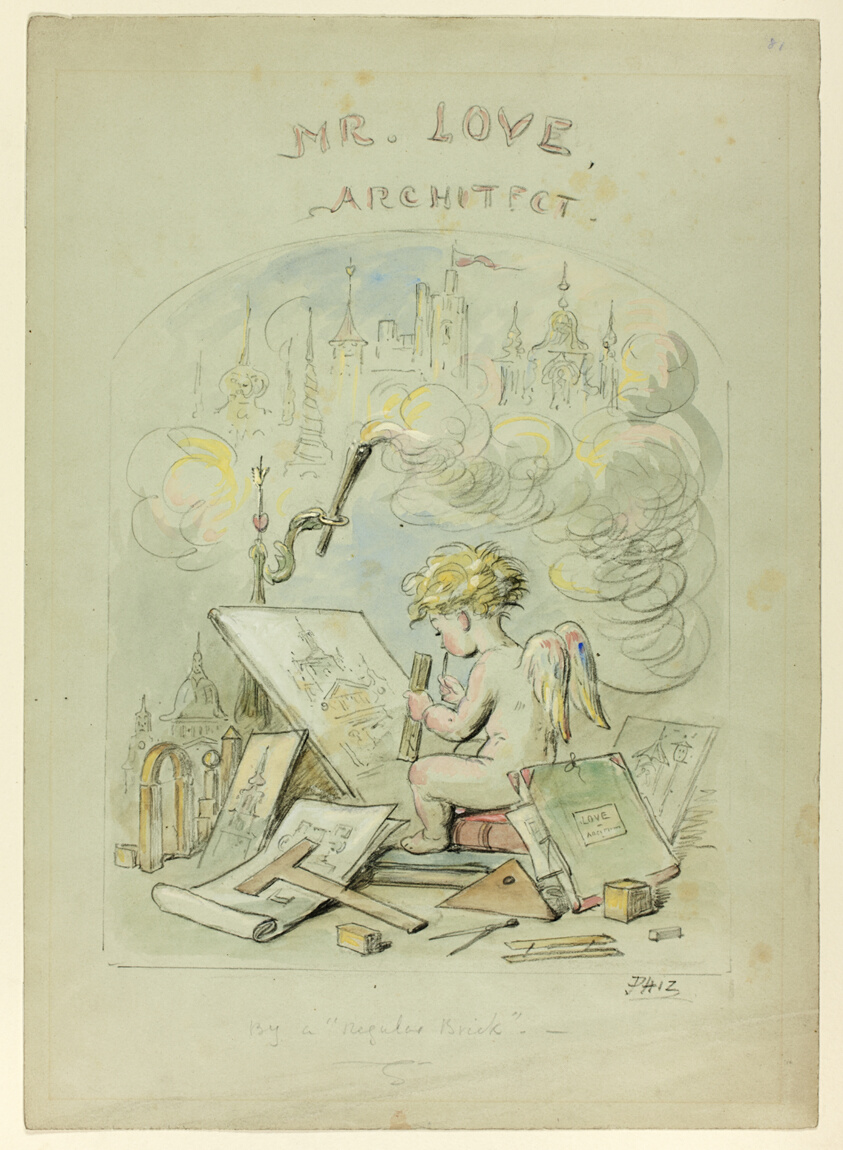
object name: Drawing and Watercolor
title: Mr. Love, Architect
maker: Hablot Knight Browne (English, 1815-1882)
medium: Watercolor and gouache, with black crayon, over traces of graphite, on grayish-green wove paper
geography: England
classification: watercolor; drawings (visual works); prints and drawing